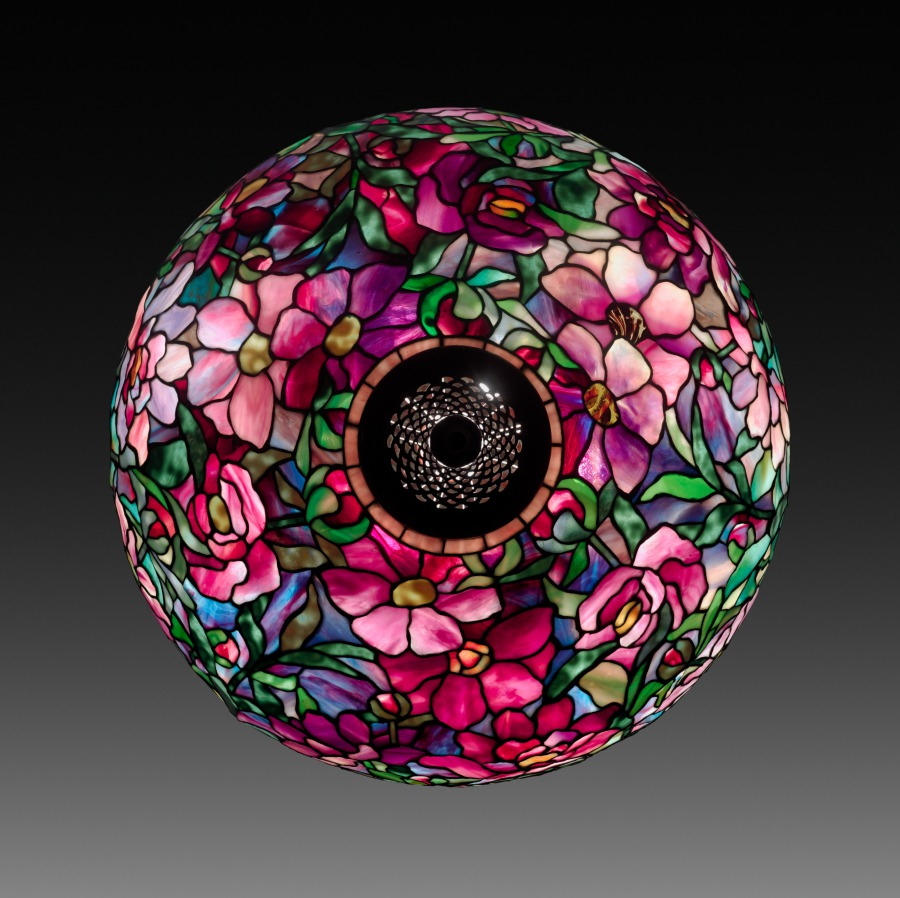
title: Peony Table Lamp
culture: America, New York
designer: probably by Clara Wolcott Driscoll (American, 1861–1944)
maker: Tiffany Studios (United States, New York, 1902–32)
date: c. 1902–10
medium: Leaded glass, bronze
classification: Lamp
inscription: Shade impressed: TIFFANY STUDIOS NEW YORK 355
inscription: Base impressed: TIFFANY STUDIOS/NEW YORK/542/ 2574 [scratched]